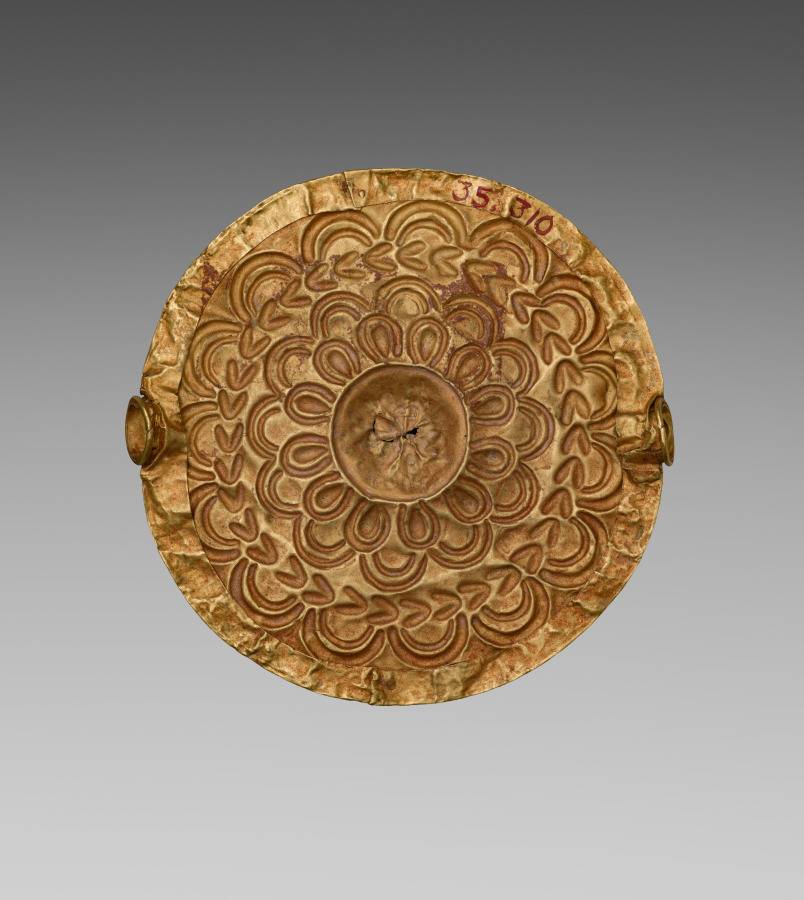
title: Disk Pendant (akrafokɔnmu)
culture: Africa, West Africa, Ghana, Asante Empire/Kingdom, probably Kumasi, member of the goldsmiths’ guild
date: 1800s, before 1896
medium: Gold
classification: Jewelry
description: Gold discs dangling on the chests of Akan state officials and elites showed their rank and duties. Worn by these akrafo (“soul people”) since the 1800s, they are often linked to kradware, officials who represent and purify (“wash”) the king’s soul. To make them, goldsmiths cast or flattened gold. Muslim North African gold coins likely inspired their form and material, while concentric water rings influenced their composition. This small disc is a typical pre-colonial example: asantehene (king) Prempeh I reportedly owned this disk. The British emptied his treasury after deposing and exiling him in 1896. Gold ornament making ceased until 1924; court officials now wear large discs.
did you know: Akan goldsmiths were organized into guilds, a kind of specialized group of artisans.